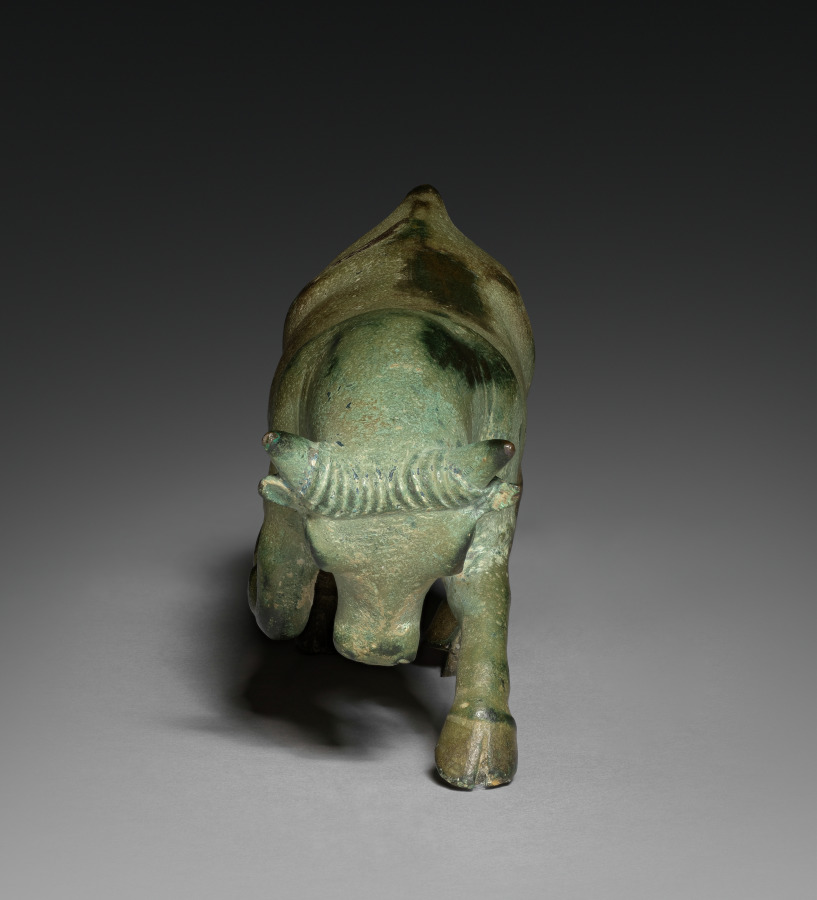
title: Pawing Bull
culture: South Italy, Lucania, Greek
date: 500–475 BCE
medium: bronze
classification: Sculpture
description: With its head slightly lowered and right foreleg raised in a pawing motion, this robust bull seems poised for action. The pose closely resembles that of bulls on coins minted at Thurii, a Greek colony in South Italy, but the statuette seems earlier in date and could have other associations. Perhaps the bull once carried the princess Europa, for example, or battled a lion or a hero. Alternatively, it may have stood alone as a small-scale offering, representing the actual bulls sometimes sacrificed to deities.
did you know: This solid-cast bronze bull is nearly intact, missing only its tail.